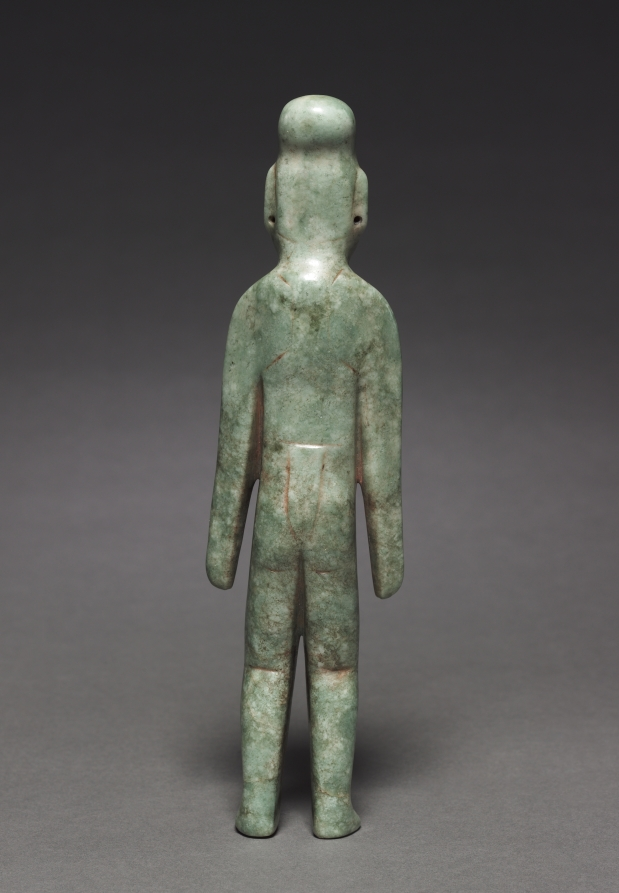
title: Standing Figurine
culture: Mesoamerica, Mexico, Olmec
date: 1900s(?)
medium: polished jadite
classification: Sculpture